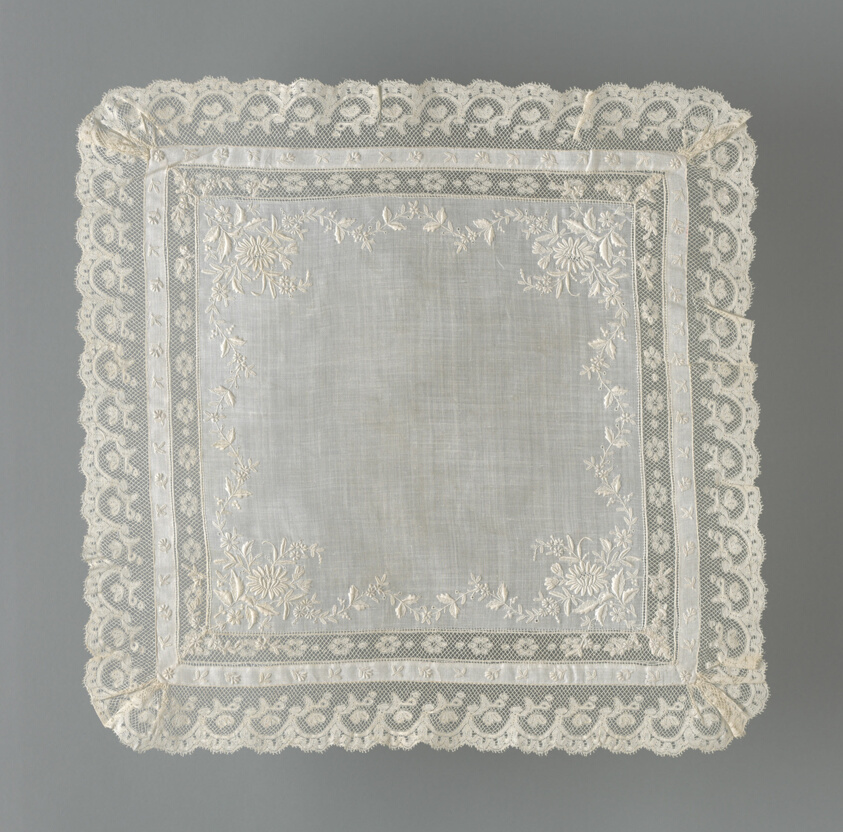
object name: Textile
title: Handkerchief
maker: France (needlework) and Belgium (lace)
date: 1875/1900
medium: Linen, plain weave; embroidered with cotton in back, eyelet, padded overcast, and padded satin stitches; buttonhole wheels; insertion and edging of cotton, bobbin straight lace of a type known as "Valenciennes"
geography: France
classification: textile; needlework (visual works); accessories (object genre); weaving